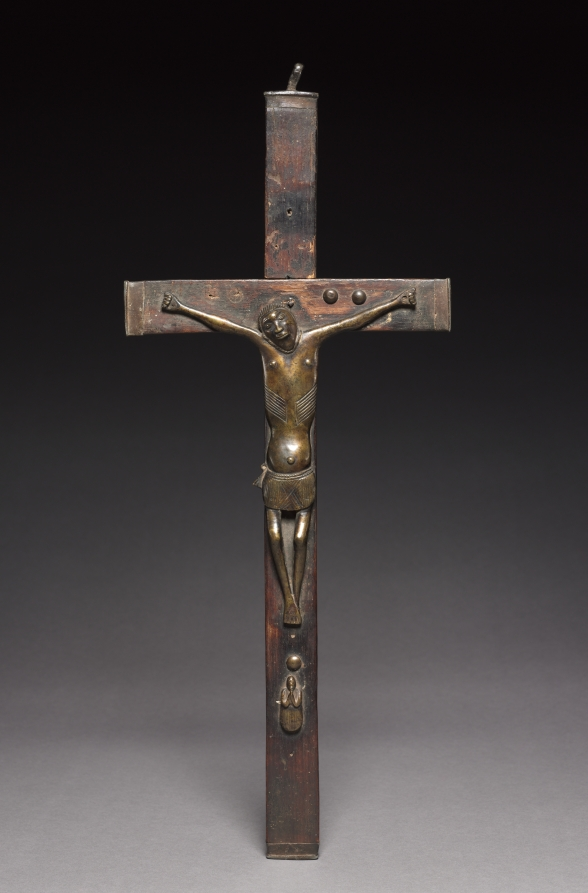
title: Crucifix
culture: Africa, Central Africa, Kongo Kingdom, Kongo-style maker(s)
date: late 1800s-early 1900s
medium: Copper alloy, wood, upholstery studs, and iron alloy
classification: Sculpture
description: An artist made this crucifix from wood and metal centuries after Catholicism became the Kongo Kingdom’s official faith. Following King Nzinga a Nkuwu's 1491 decision to convert, Kongo Christianity uniquely reflected its surroundings. While early Christ images arrived from Portugal and Italy, this later local example has braids like a Kongo man. Worn smooth by repeated touch, the lower figure is the Virgin Mary or a worshiper knelt in mourning or respect. The x-shape incised into his waist wrapper references the dikenga dia Kongo. This likely pre-Christian symbol diagrams the life cycle's four points.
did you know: This x-shapes of the cross and on Christ's wrapper are forms with symbolic meaning tied to the life cycle in both Catholicism and in the indigenous Kongo religion.